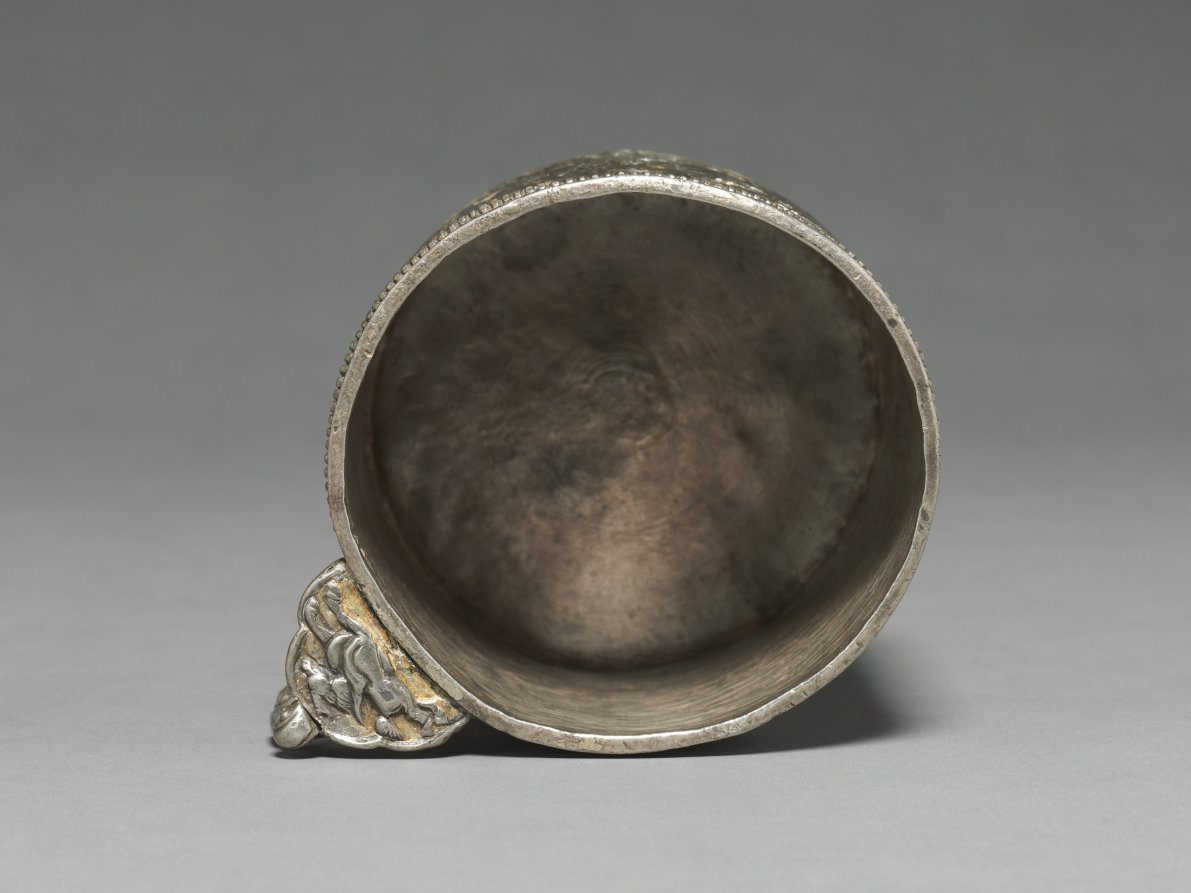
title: Beaker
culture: Central Asia (Sogdiana) or Tibet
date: c. late 600s–early 700s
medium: silver with gilding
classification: Silver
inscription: Inscribed on bottom of the cup: "Phan shing gong skyes gui sug byad (or byang)"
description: The circular shapes of the cup’s handle feature a flat edge on which the user rested their thumb for better grip, a design characteristic of silver objects made during the 700s by Sogdian artists, who traveled from Central Asia along international trade routes. An ownership inscription in Tibetan script on the underside of the cup identifies the vessel as a personal possession. The circles and lines carved below this inscription are likely measurements recording the weight of the silver used for the cup.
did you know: This cup depicts two lions and a lionlike animal with horns!